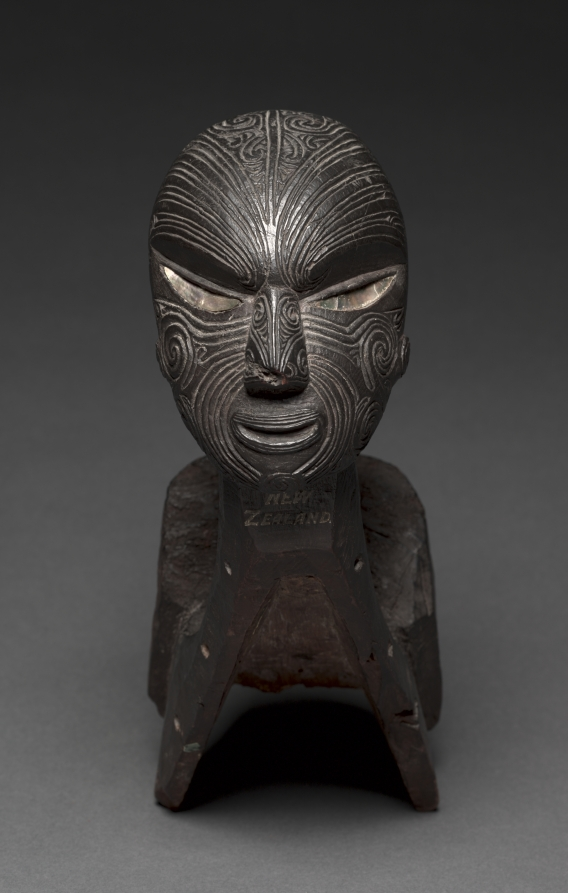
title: Fishing Canoe Prow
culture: Polynesia, New Zealand, Maori people, 19th century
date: 1800s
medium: wood with haliotis (pearl) shell inlay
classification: Sculpture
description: Intricate surface patterning characterizes Maori wood carvings. The swirls and spirals covering the face on this canoe prow replicate traditional facial tattoo patterns. Similar designs were used for post and gable figures that adorned both dwellings and compounds.